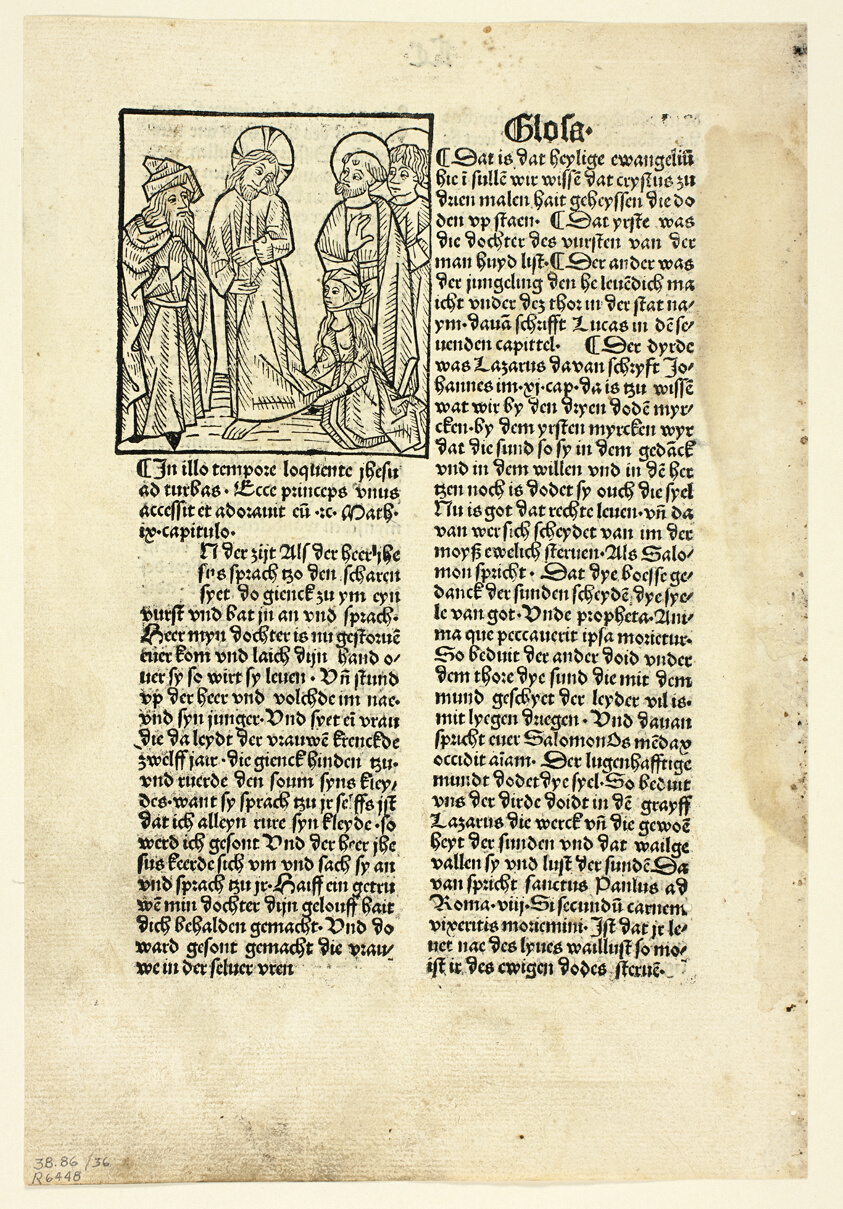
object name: Print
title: The Woman Healed of an Issue of Blood from Plenarium (also called Deutsche Evangelien und Episteln, or German Gospels and Epistles), Plate 36 from Woodcuts from Books of the 15th Century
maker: Unknown Artist (Strasbourg, late 15th century); printed and published by Ludwig von Renchen (German, active 1485–1505); portfolio text by Wilhelm Ludwig Schreiber (German, 1855–1932)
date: 1489, portfolio assembled 1929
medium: Woodcut in black, and letterpress in black (recto and verso), on buff laid paper, tipped onto cream wove paper mat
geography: Germany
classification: woodcut; print; prints and drawing